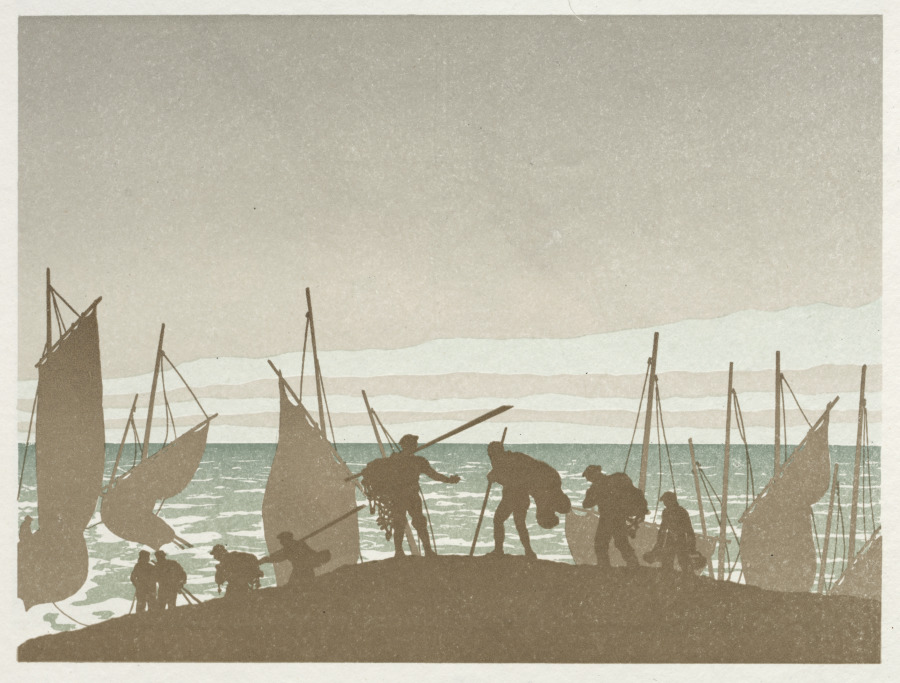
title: The Wandering Jew: The Plain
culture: France, 19th century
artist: Henri Rivière (French, 1864–1951)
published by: Verneau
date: 1896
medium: color lithograph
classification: Portfolio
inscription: title page is signed, in blue crayon: Henri Rivière